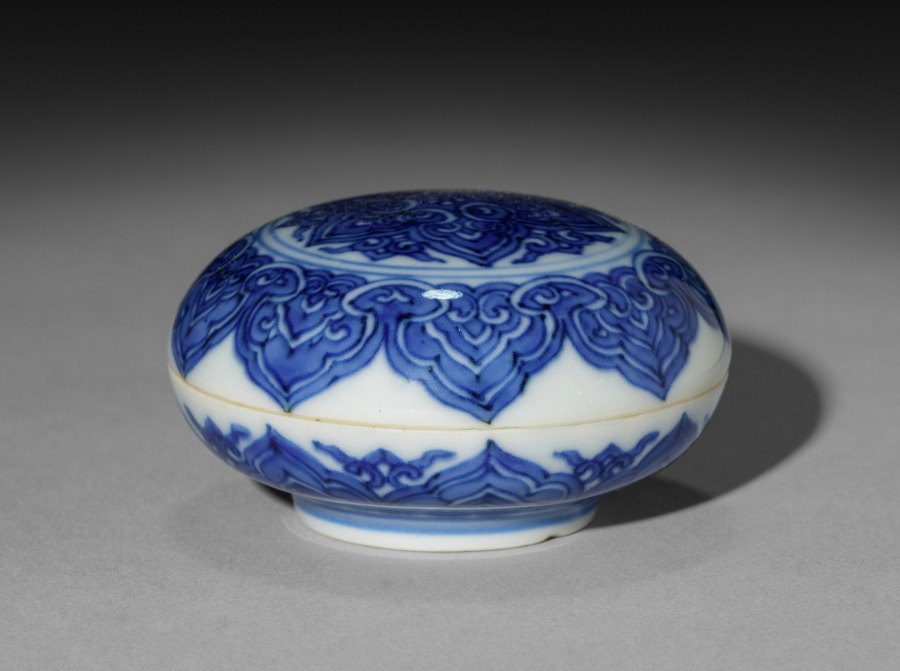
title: Round Covered Box with Medallions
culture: China, Jiangxi province, Jingdezhen kilns, Ming dynasty (1368-1644), Jiajing mark and reign (1522-66)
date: 1522–66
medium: porcelain with underglaze blue decoration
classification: Ceramic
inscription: 大明嘉靖年製